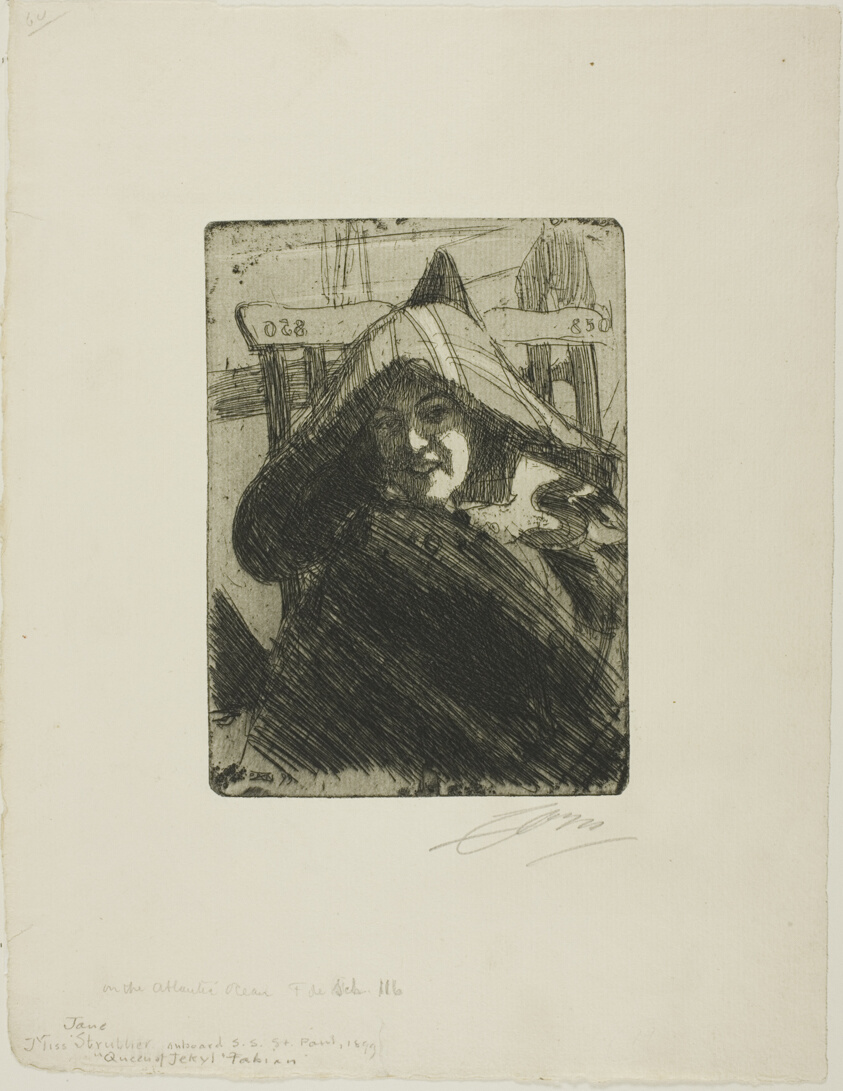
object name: Print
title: On the Atlantic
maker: Anders Zorn (Swedish, 1860-1920)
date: 1899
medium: Etching on ivory laid paper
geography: Sweden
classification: etching; print; prints and drawing